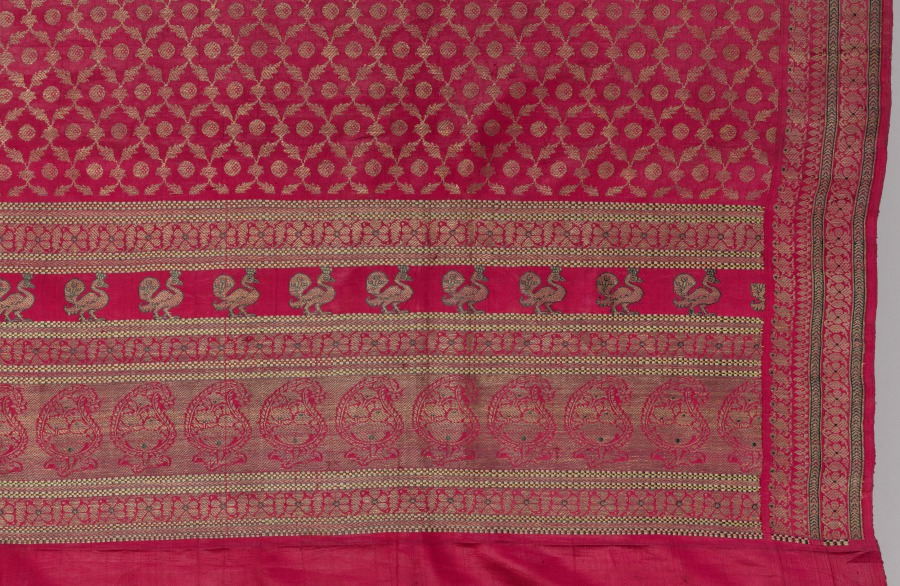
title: Gold Brocade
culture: India, 19th century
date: 1800s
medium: brocade; silk and metal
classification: Textile